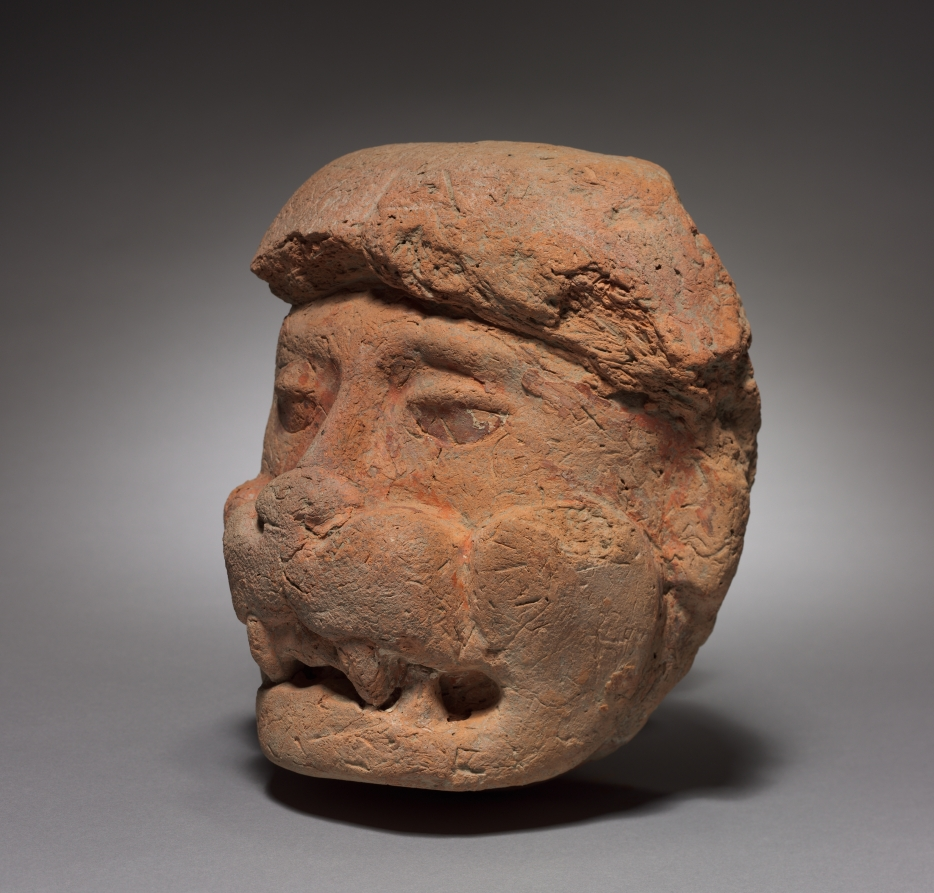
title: Architectural Sculpture Fragment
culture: Mexico, Oaxaca, Zapotec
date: c. 700–1000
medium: unfired clay, covered with painted stucco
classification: Ceramic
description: This architectural sculpture fragment probably once formed part of a tomb façade; technically similar sculptures have been found at the Zapotec site Lambityeco. Ancestral tombs were usually located beneath the courtyard of the family home and were often reused for successive generations. This image of a man wearing a feline mask over the lower face may portray a lineage founder.